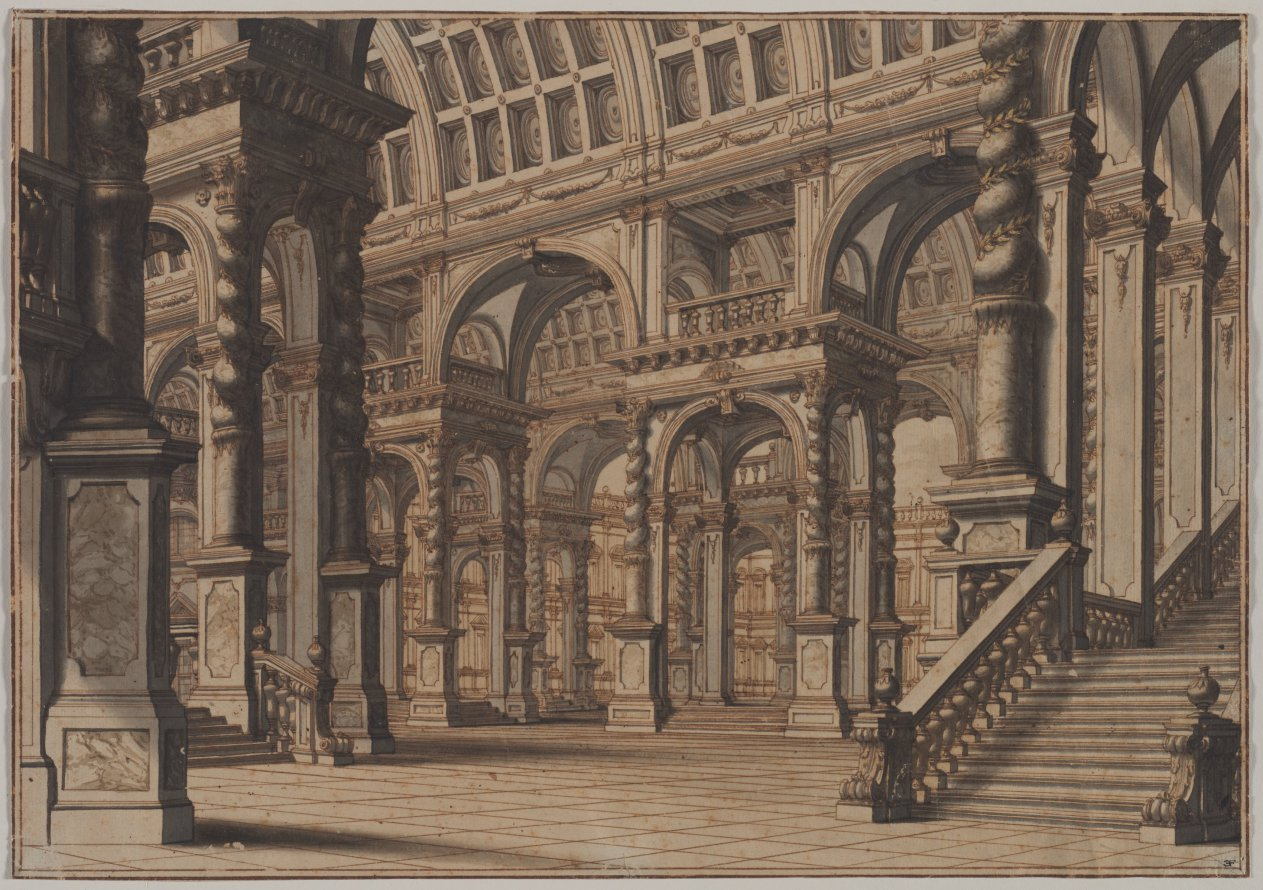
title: Monumental Vaulted Hall with Staircase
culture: Italy, 18th century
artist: Giuseppe Galli Bibiena (Italian, 1696–1757)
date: second quarter 18th century?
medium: pen and brown ink and brush and gray wash, with brush and brown wash and traces of yellow gouache; framing lines in brown ink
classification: Drawing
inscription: VERSO, center right, in graphite: F 133 [circled ; lower right, in graphite: 26 [circled, underlined]